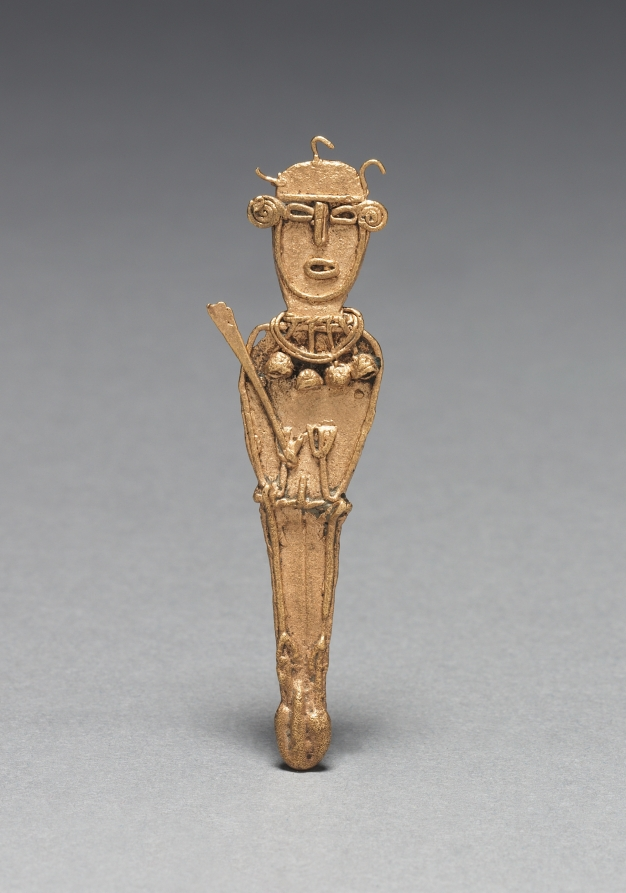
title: Tunjos (Votive Offering Figurine)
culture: Colombia, Muisca style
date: c. 900–1550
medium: cast gold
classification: Metalwork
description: Unlike the other gold ornaments made in the isthmian region, tunjos were not worn; instead, they served as offerings that were deposited in sacred places such as lagoons and caves. They often depict humans who hold something. Perhaps because they were not meant for display, tunjos were not finished after lost-wax casting. Flaws remain uncorrected, surfaces are unpolished, and gold that backed into the channel used to pour the molten metal into the mold was left in place.